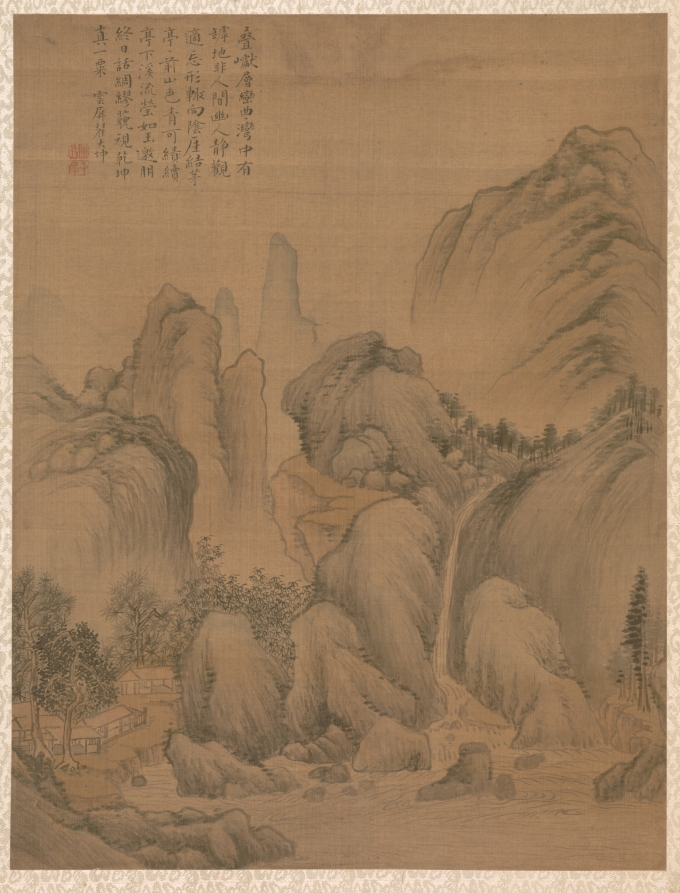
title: Landscape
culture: China, Qing dynasty (1644-1911)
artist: Zhai Dakun (Chinese, d. 1804)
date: 1775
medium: album leaf; ink and color on silk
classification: Painting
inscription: Folded hills and layered peaks curve back and forth, Among them is a ravine removed from the world or men. There a recluse mediates, intent on "forgetting forms," Often he faces the dark cliffs where he has built a thatched hut. Below the pavilion, the flowing stream is as lustrous as jade. With an invited friend one spends the entire day in intimate conversation, Treating Heaven and Earth as nothing more than a speck. Yunping Zhai Dakun Seals: 1) r/i "Dakun" 2) r/r "Zihou"